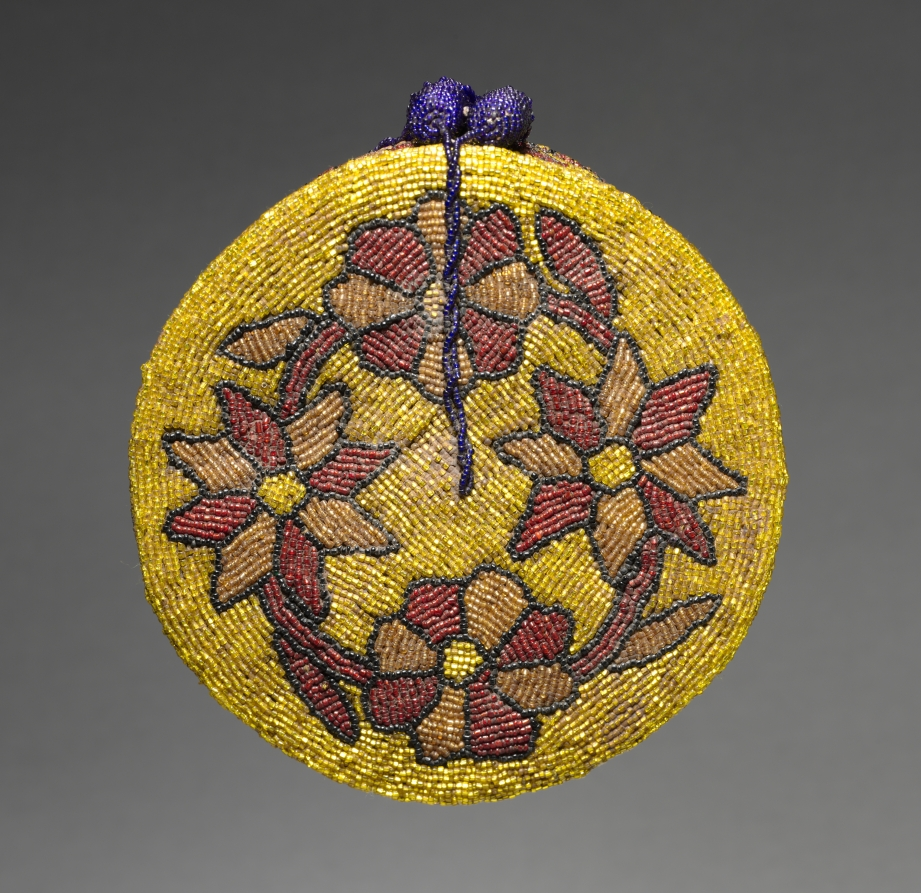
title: Coronet (oríkògbófo)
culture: Africa, West Africa, Nigeria, Yorùbá-style maker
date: 1900s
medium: Cloth, glass beads, and thread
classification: Garment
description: Like the rare conical crown (ade), the coronet (oríkògbófo) may only be worn by a king descended from Oduduwa, the first king of the Yorùbá. While the crown is reserved for special occasions, the coronet may be used by the king for less formal public events and when entertaining non-Yorùbá visitors. It signifies wealth rather than royal status.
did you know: The beads on this sculpture were imported, likely from Venice or Bohemia (now called the Czech Republic).